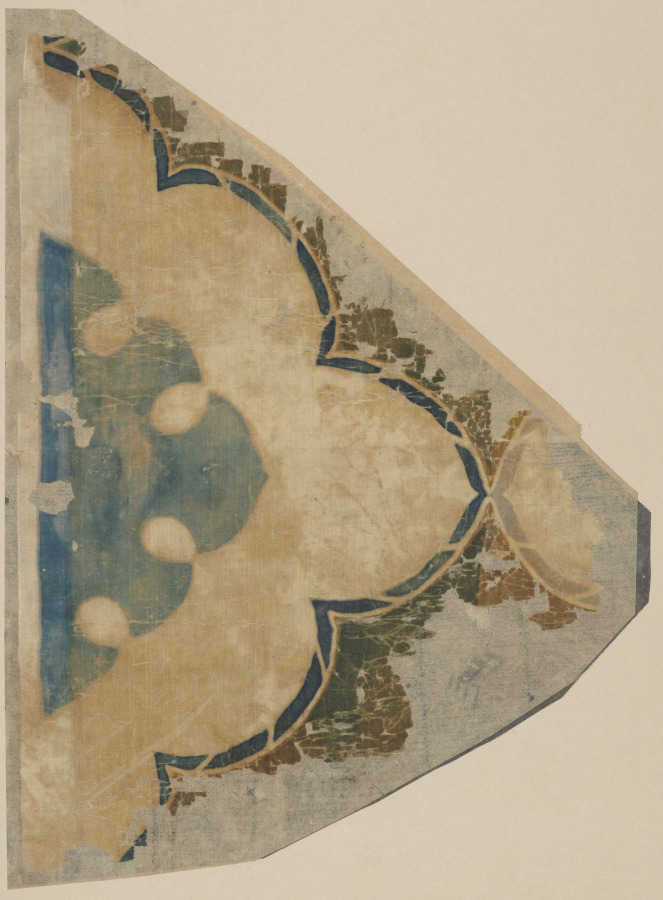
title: Fragment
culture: China or Japan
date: 700s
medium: plain cloth, batik printed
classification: Textile